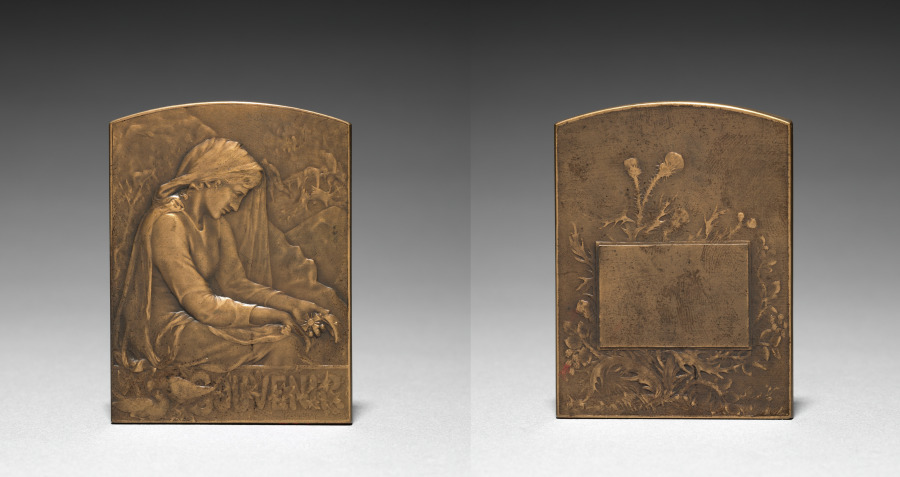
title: Medallion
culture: France, 19th century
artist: Marie Alexandre Lucien Coudray (French, 1864–1932)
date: 1900s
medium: bronze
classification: Metalwork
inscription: "SOUVENIR"; signed: "L. Coudray."